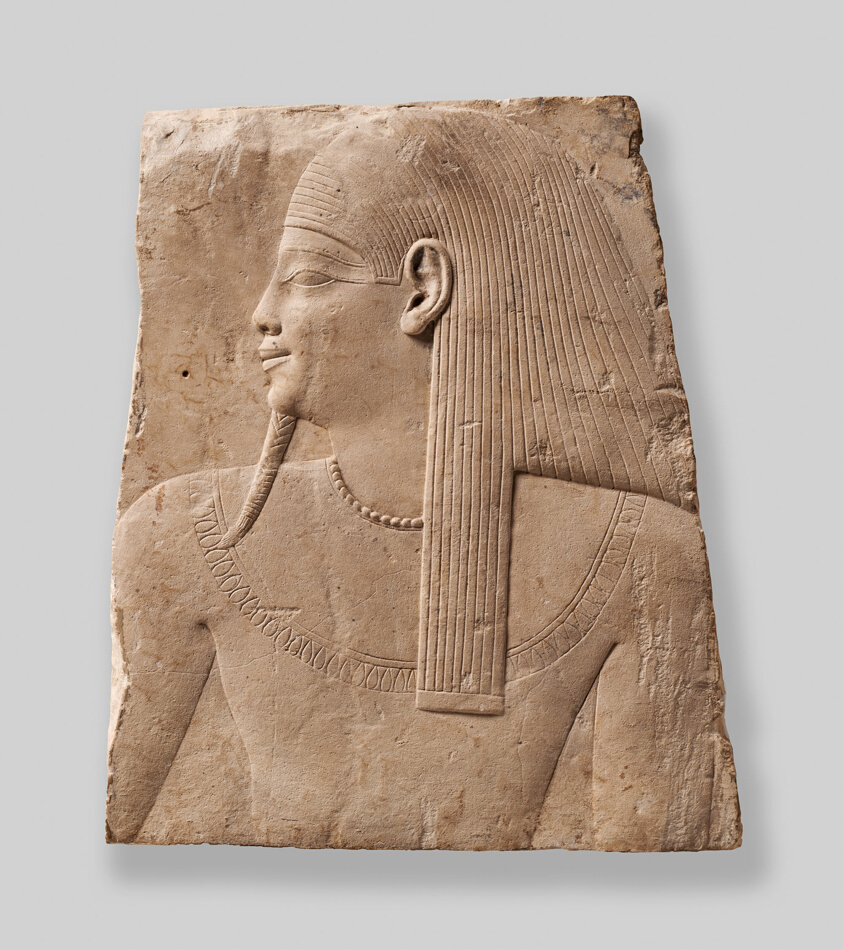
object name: Architectural fragment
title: Relief Depicting a God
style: ptolemaic, greco-roman (egyptian), ancient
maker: Egyptian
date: Ptolemaic Period (332–30 BCE)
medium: Limestone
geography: Egypt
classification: relief; stone; sculpture; ancient art; plaque (flat object)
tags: gods (deities)